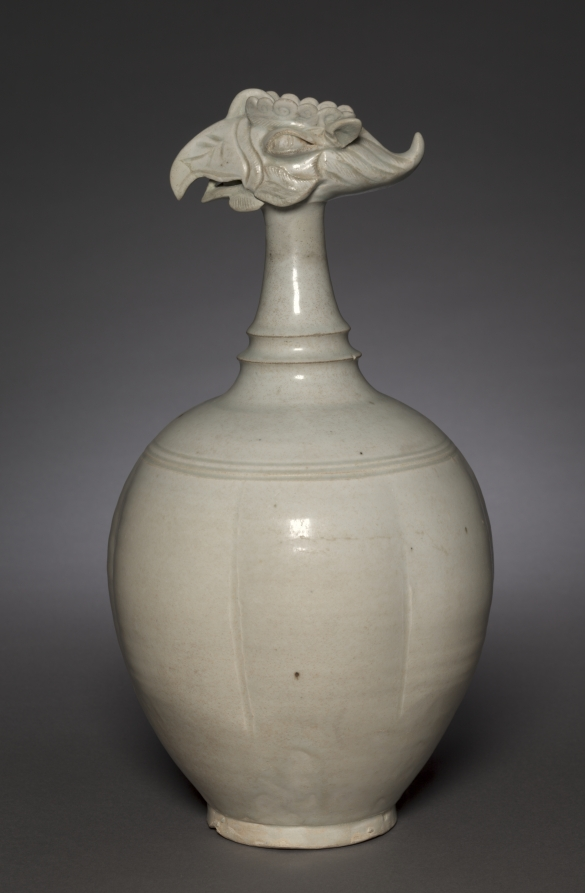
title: Phoenix-Headed Ewer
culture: China, possibly Guangdong Province, Xicun, Northern Song dynasty (960–1127)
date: 1000s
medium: porcelain with pale greenish-white glaze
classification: Ceramic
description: Phoenix-headed ewers of this type have been unearthed at Xicun in Guangdong province. Wares with a thick and coarse body were fired in local Xicun kilns, but those with a thin and refined body—such as this piece—were likely produced at Jingdezhen in Jiangxi province.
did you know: The phoenix's beak forms a spout for pouring.